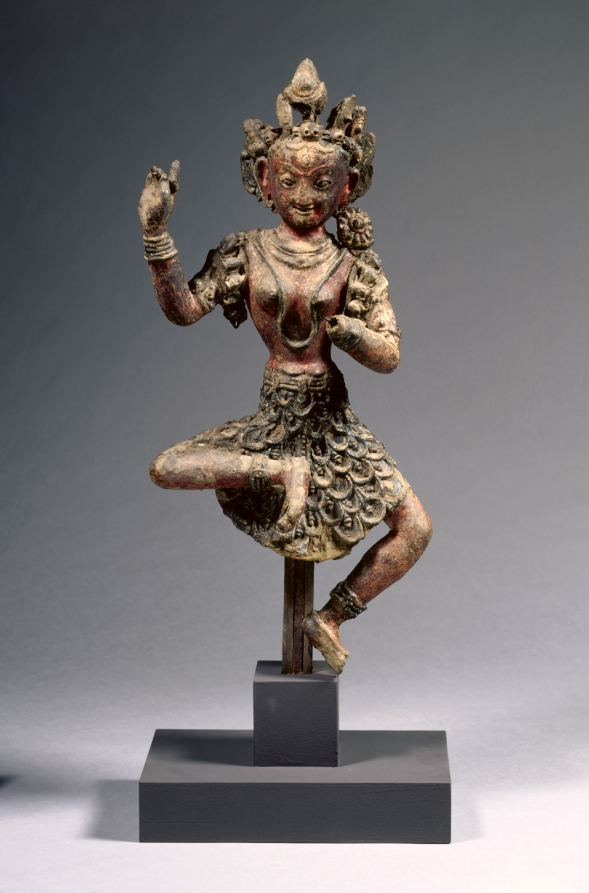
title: Goddess Vajravarahi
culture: Nepal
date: c. 1040–c. 1310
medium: unbaked clay and pigment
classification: Sculpture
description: This powerful red goddess dances vigorously and raises one hand that would have held a flaying knife, while the other once held a skull cup. Her bone skirt and garland of freshly severed heads complement the skulls that adorn her crown. Her eyes bulge, her brow furrows, and she bares her teeth. These attributes communicate her power to assist her followers in overcoming passions, ignorance, and fear. This is one of the earliest surviving images made of unbaked clay, using an iron armature and rope strings to support the ornament.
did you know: The wooden post is an original and would have been set into a sculpted corpse.